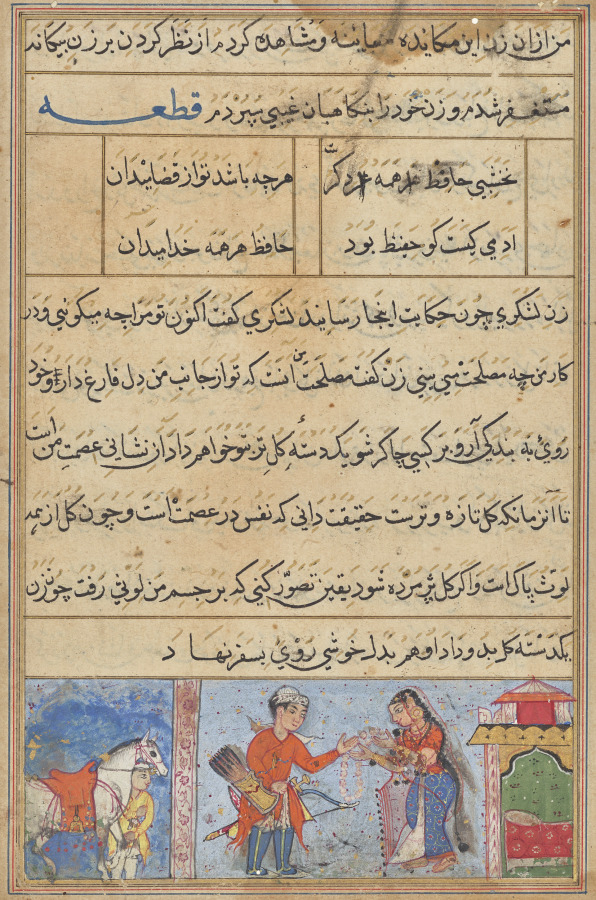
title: The soldier receives a garland of roses from his wife which will remain fresh as long as she is faithful, from a Tuti-nama (Tales of a Parrot): Fourth Night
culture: Mughal India, court of Akbar (reigned 1556–1605)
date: c. 1560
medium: gum tempera, ink, and gold on paper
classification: Painting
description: Upon his departure, a warrior’s wife gives him roses that stay fresh as long as she remains faithful in his absence. This story reveals a connection between virtue and nature: the flowers remain fresh because of her loyalty. The stories in the Tuti-nama reveal the interconnectedness of Indian, Persian, and Central Asian populations. The Persian retellings of Sanskrit tales found in this manuscript were completed in 1330 by the learned Central Asian Sufi author Ziya’ al-din Nakshabi working in Delhi, the capital of India. Indian and Persian artists worked together to illustrate this copy for the Mughal emperor Akbar.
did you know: This work is attributed to the same unnamed artist who painted folio 45r (CMA 1962.279.45.a).